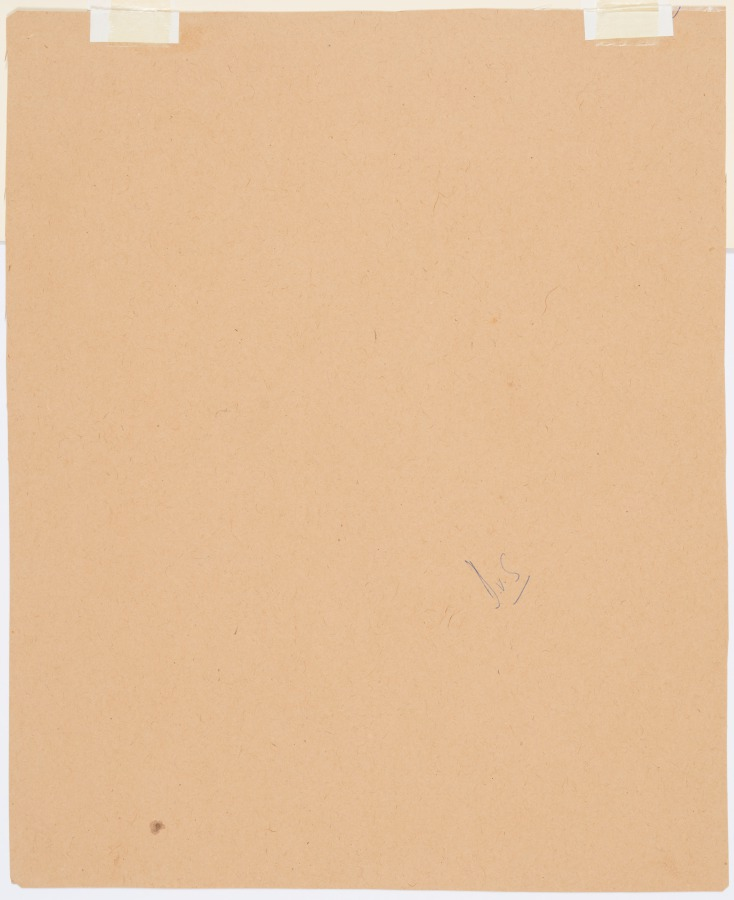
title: Rati, the Goddess of Erotic Love, Takes Aim at Krishna, from a Rasikapriya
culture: Northwestern India, Rajasthan, Rajput Kingdom of Raghogarh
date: c. 1660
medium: Gum tempera and gold on paper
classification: Painting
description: In a brightly lit chamber, the heroine (nayika) confers with her confidante (sakhi), perhaps to convey a message to Krishna, who sits in a grove near a lotus pond at the lower right. In the lower left corner, Rati shoots a flower arrow at Krisha to smite him with love for the nayika. The empty bower in the upper right awaits the lovers’ tryst.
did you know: Most of the white pigment has flaked off of this painting.